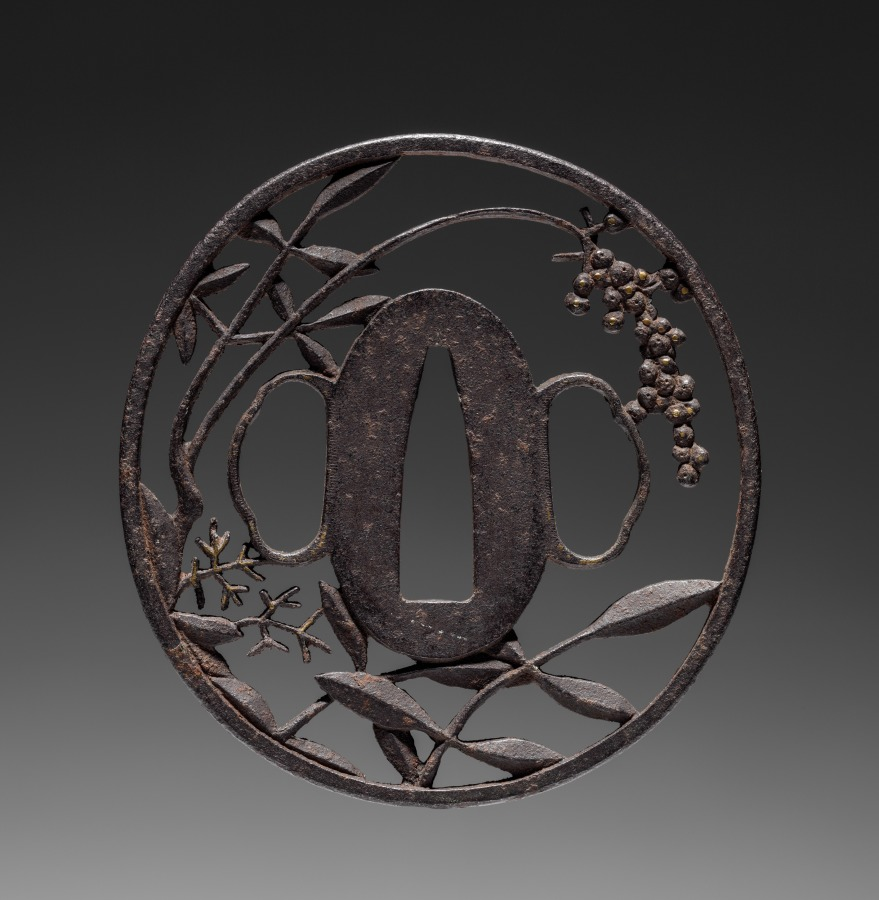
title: Sword Guard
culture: Japan, Edo period (1615–1868)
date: 1615–1868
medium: iron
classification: Arms and Armor